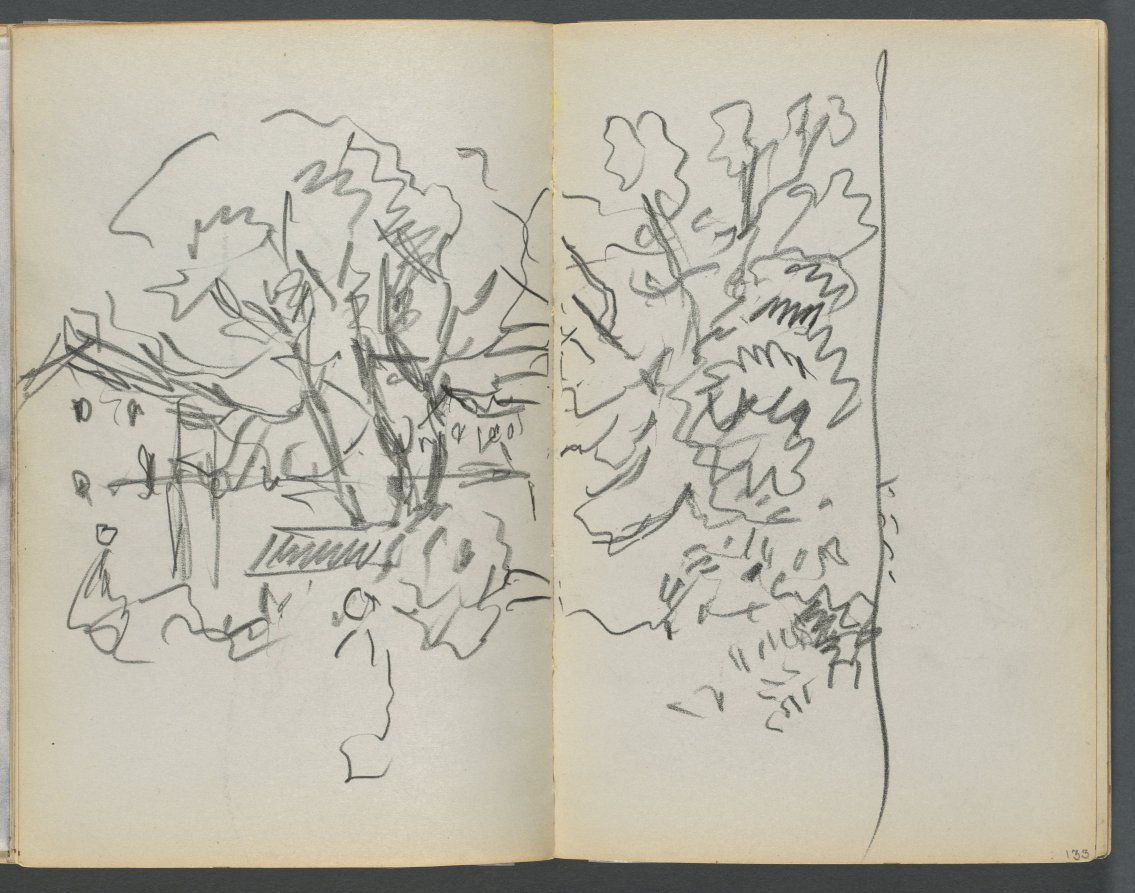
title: Sketchbook, The Dells, N° 127, page 132 & 133: Landscape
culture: America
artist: Maurice Prendergast (American, born Newfoundland [now Canada], 1858–1924)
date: c. 1919–1921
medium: graphite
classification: Bound Volume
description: This sketchbook contains 59 pages of graphite drawings and 16 watercolors made at various locations on Cape Ann, Massachusetts.